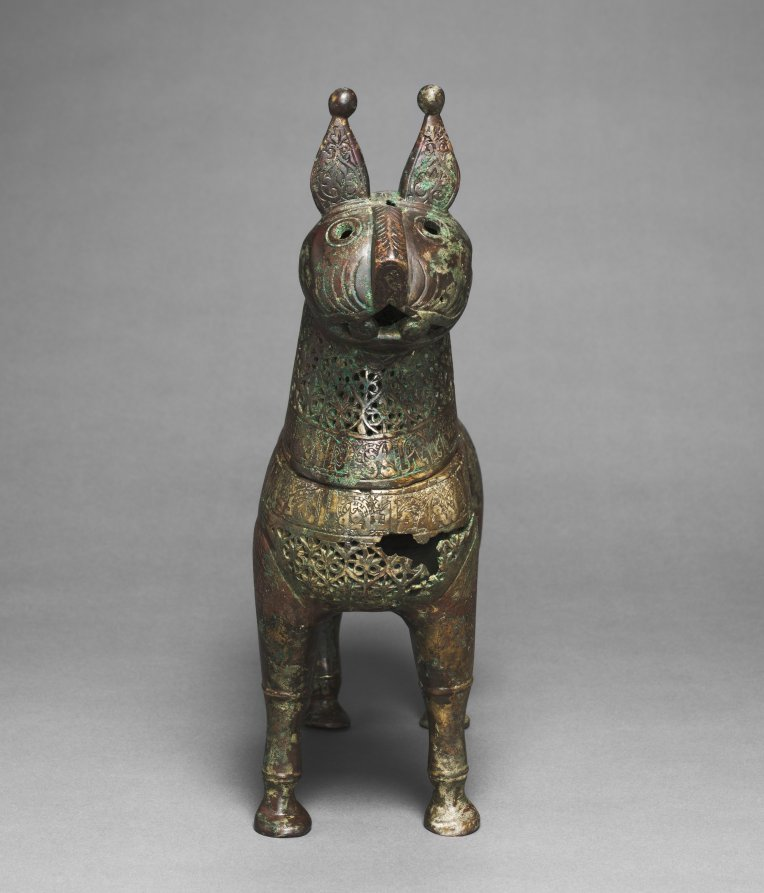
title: Feline Incense Burner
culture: Iran, Khurasan, Seljuq period of Iran (1037–1194)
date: 1150–1200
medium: Copper alloy, cast, engraved, chased, and pierced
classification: Metalwork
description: In Iran during the 1000s and 1100s, vessels in the shape of animals gained popularity, especially as incense burners. Felines were favored in Persian art and this piece may represent a caracal, a type of lynx. The head of the creature was cast separately and is removable to fill its body with hot coals and incense. Qur’anic verses on the neck and spine remind worshippers to set work aside, attend prayer, and then disperse to seek God’s bounty. The diffusion of perfumed smoke through the burner’s pierced palmette design may have served as a sensorial reminder of this teaching.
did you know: Arabic inscriptions in Kufic script against a background of scrolling arabesques run along the back and neck of the feline form.